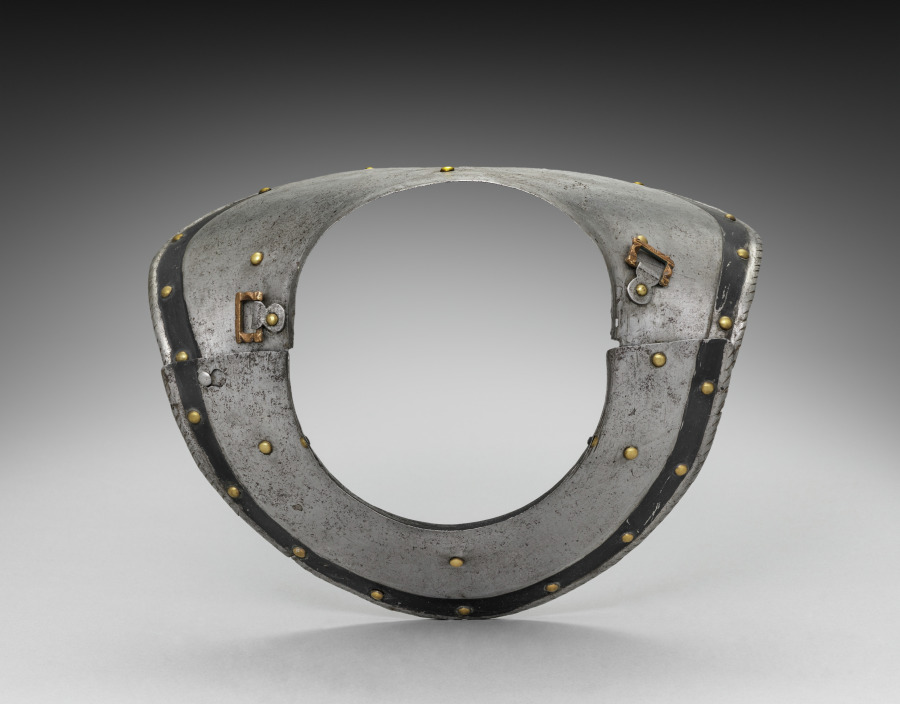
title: Colletin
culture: Germany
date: c.1550–1570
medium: iron, steel, leather and brass rivets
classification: Arms and Armor